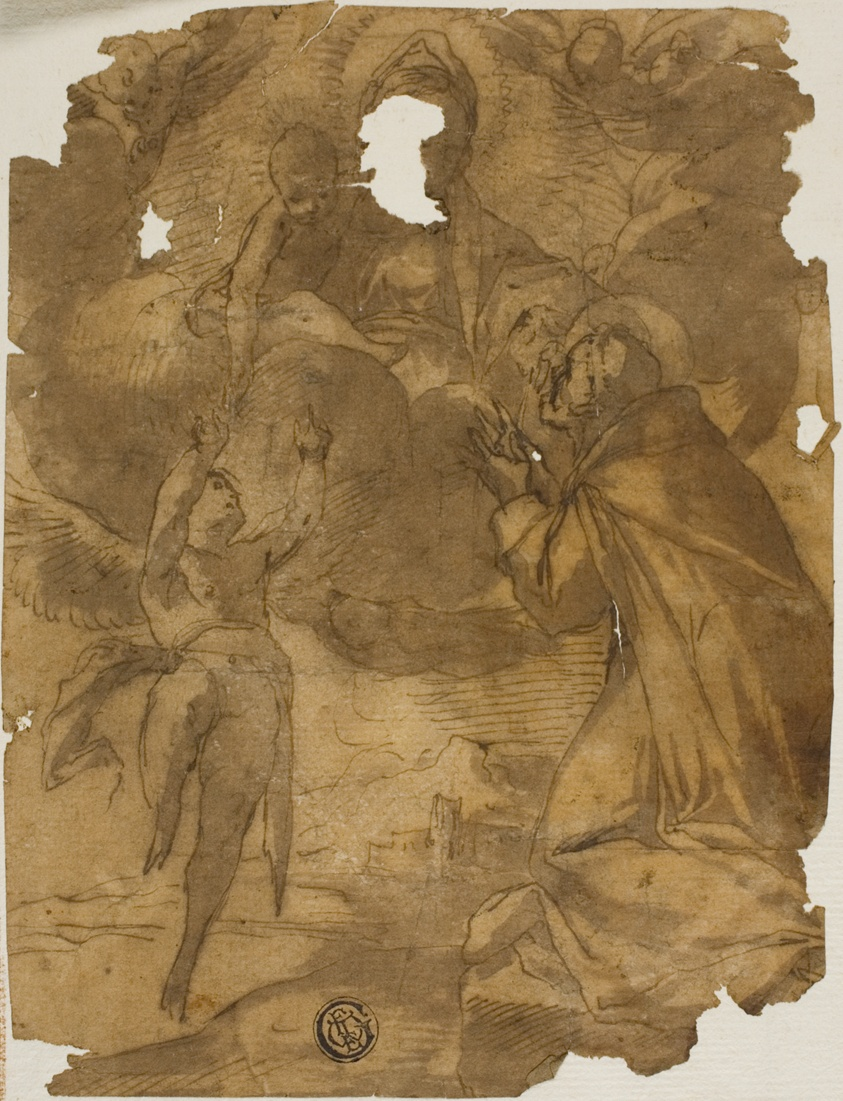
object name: Drawing and Watercolor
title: Madonna and Child Appearing to Male Saint and Angel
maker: Attributed to the Style of Andrea Boscoli (Italian, 1550-1606); or Lodovico Carracci (Italian, 1555-1619); or Domenico Fiasella (Italian, 1589-1669)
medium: Pen and brown ink, with brush and brown wash, on tan laid paper, laid down on ivory laid paper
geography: Italy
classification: pen and ink drawings; drawings (visual works); prints and drawing